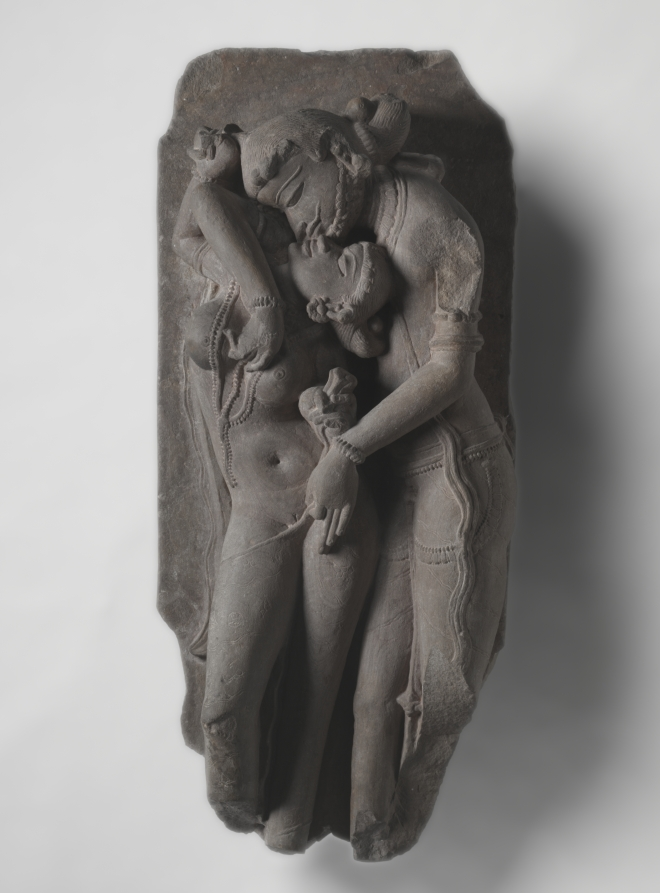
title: Lovers (Mithuna)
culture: India, Madhya Pradesh, Khajuraho, Medieval period, Candella dynasty, 11th century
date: 1000s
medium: sandstone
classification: Sculpture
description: Erotic imagery was a standard element on sacred monuments in India. Idealized lovers signal the auspiciousness of birth, prosperity of life, and the abundance of the created world, indicating to worshippers at the temple that their offerings and prayers would be fruitful and productive. The exaggerated size of their eyes, linearity of the facial features and ornaments, and the impossible twisting of their limbs and her body create an unnatural stylization that heightens the intensity of the scene, as the two figures seem effortlessly unified in their embrace.